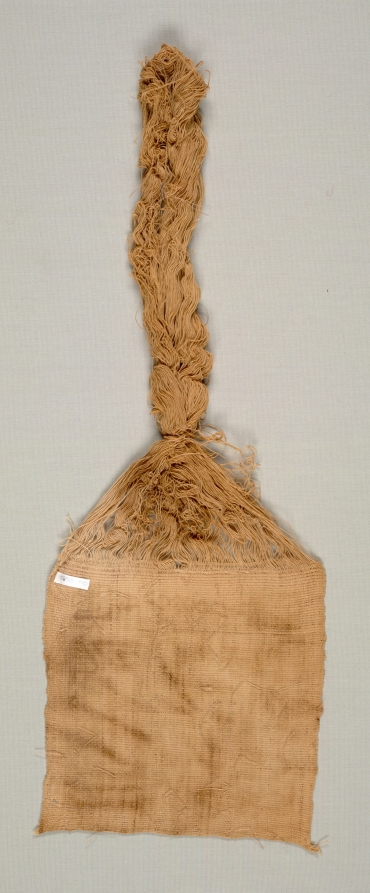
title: Mummy Bundle "Mask"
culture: Peru, South Coast, Ica Valley, Ocucaje site, Paracas style (700 BCE–1 CE)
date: 400–200 BCE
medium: cotton and pigment, plain weave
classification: Textile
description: The Paracas people buried their dead in bundles that they created by carefully wrapping the seated human body in layers of garments and other textiles. In some cases, they placed a painted cloth—such as these examples—on the outer layer and at the top of the bundle. The hair-like yarns (unwoven warps) were arranged around a solid cotton disk that was sometimes wrapped with a headband. The cloths, then, seem to have functioned as the bundle’s head, even though some are painted not with faces but with complete figures whose supernatural character is marked by the appendages streaming from their bodies.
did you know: These masks fall into two categories, those with only a face and those with a full-bodied figure.